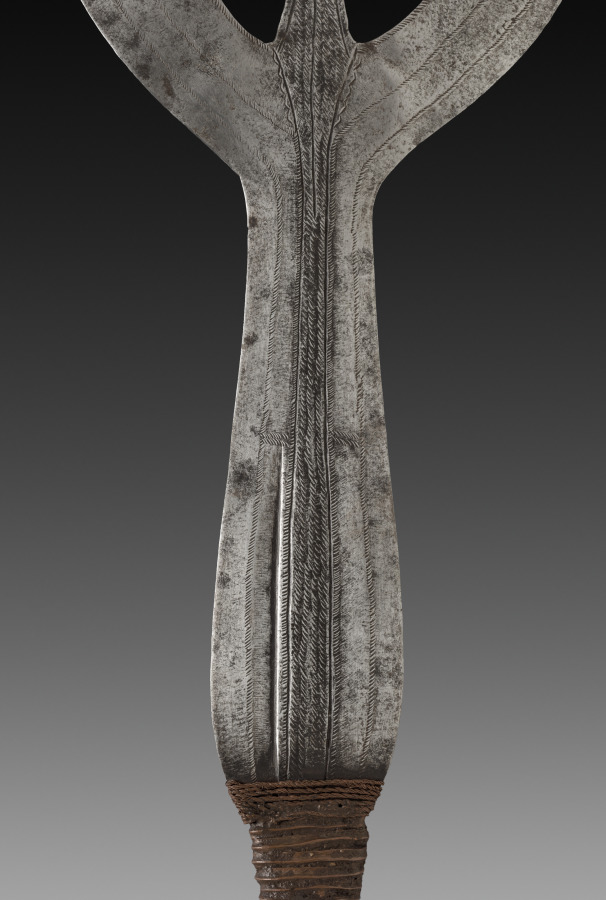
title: Sword (ngulu)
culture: Ngombe, Doko, or Iboko people, Democratic Republic of Congo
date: late 1800s to early 1900s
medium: Iron alloy, wood, and copper alloy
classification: Arms and Armor